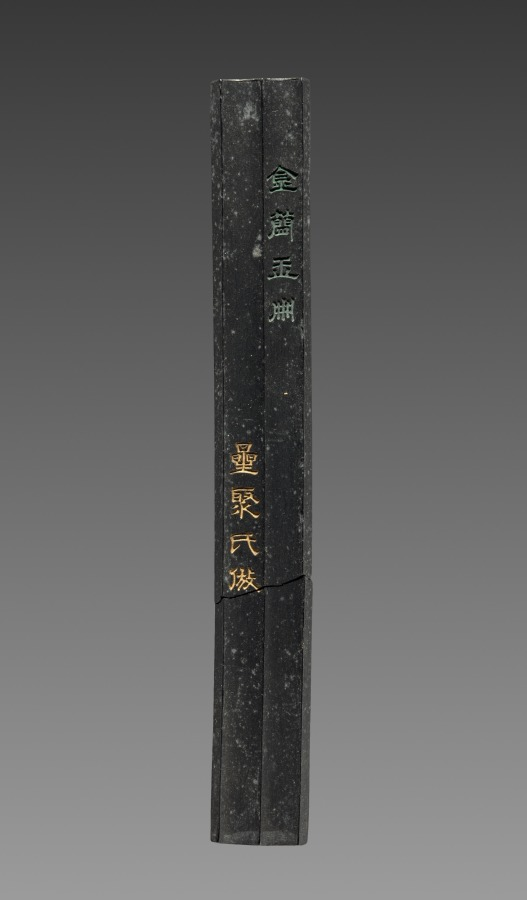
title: Ink Cake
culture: China, Qing dynasty (1644-1911)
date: late 19th Century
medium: ink cake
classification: Miscellaneous